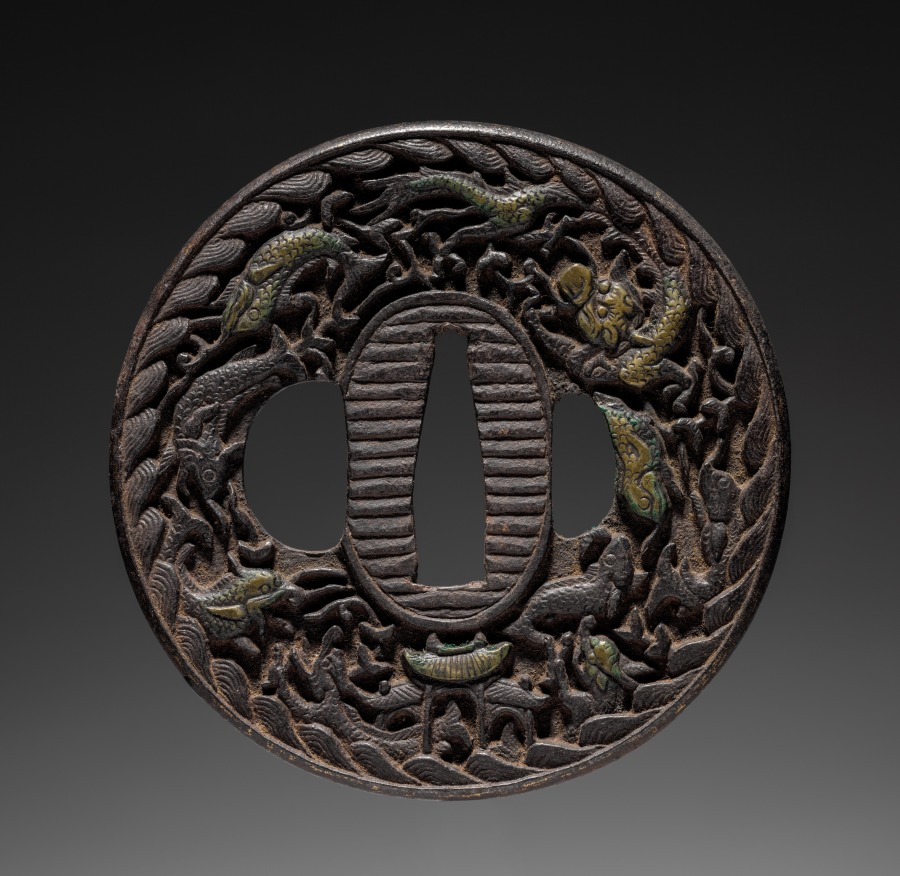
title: Sword Guard (Tsuba) with Dragons, Tiger, Fish, and Palace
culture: Japan, possibly Edo period (1615-1868)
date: c. 1615–1868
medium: iron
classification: Arms and Armor